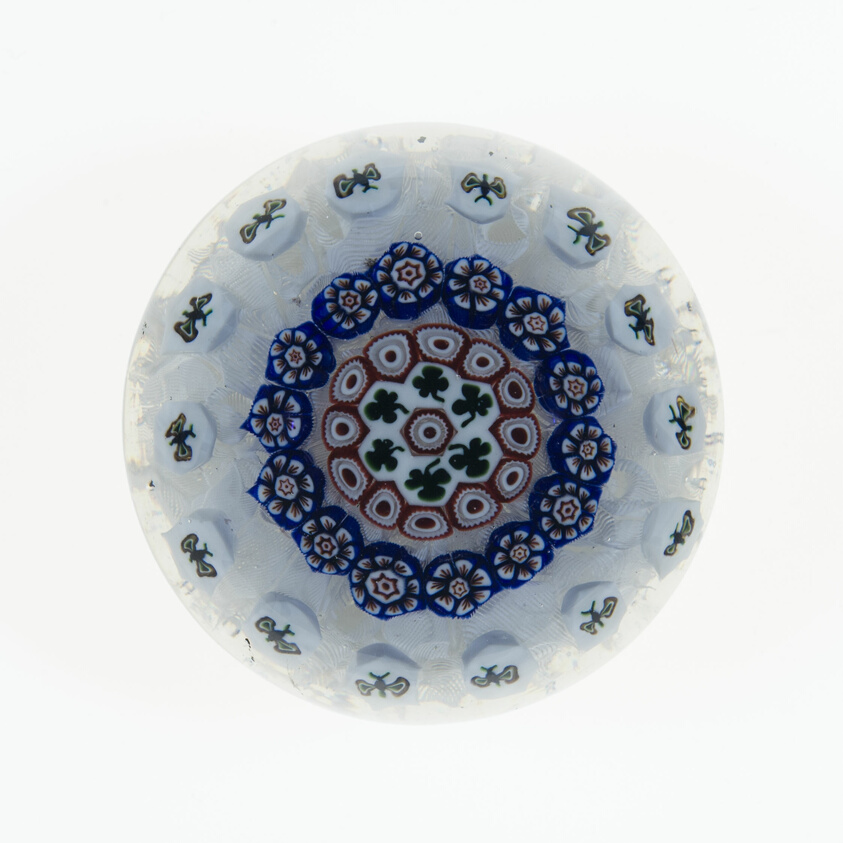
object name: Glass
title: Paperweight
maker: Baccarat Glassworks (Cristalleries de Baccarat); Lorraine, France, founded 1764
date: c. 1846–55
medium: Glass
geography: Lunéville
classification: paperweight; millefiori; european decorative arts; glass